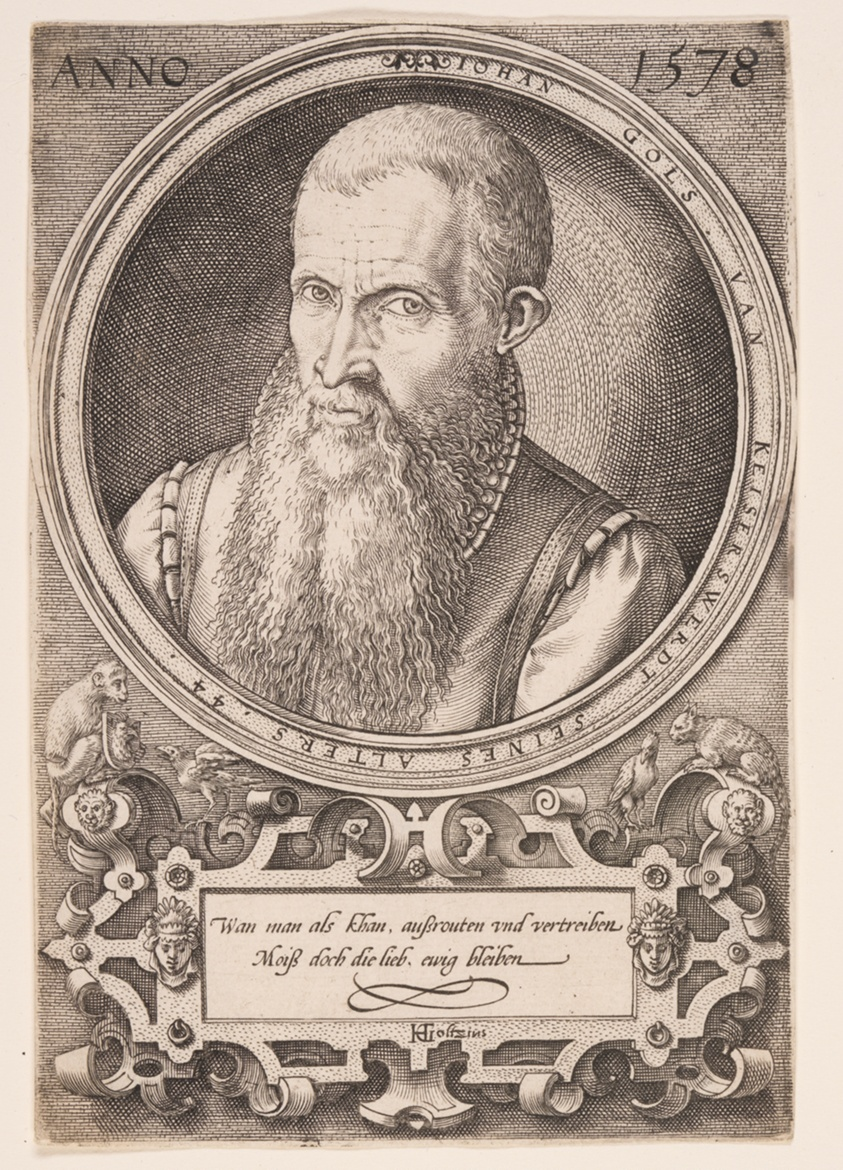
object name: Print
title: Jan Goltz II, Father of the Artist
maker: Hendrick Goltzius (Dutch, 1558–1617)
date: 1578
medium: Engraving on laid paper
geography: Netherlands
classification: engraving; paper; print; prints and drawing